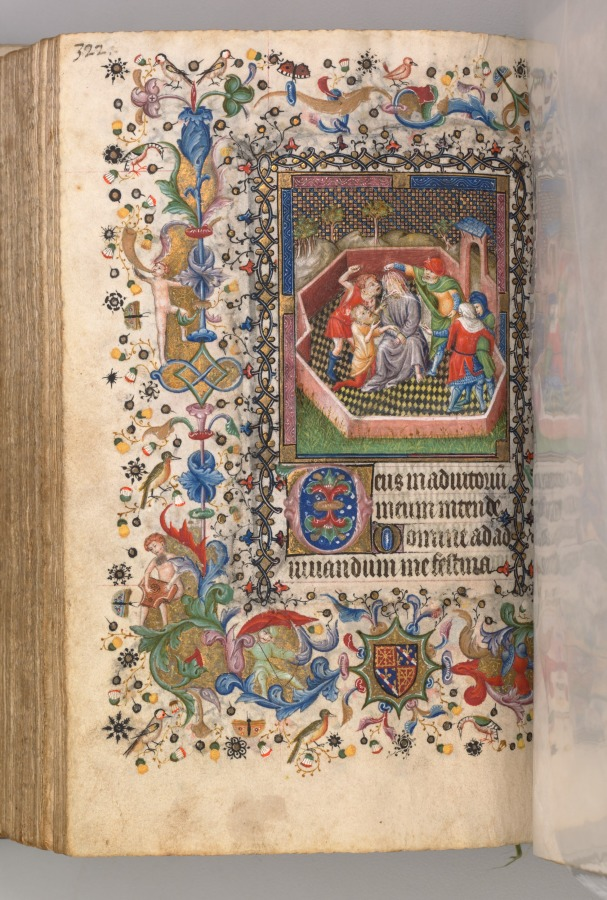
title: Hours of Charles the Noble, King of Navarre (1361-1425): fol. 161v, Mocking of Christ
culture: France, Paris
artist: Master of the Brussels Initials and Associates (French)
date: c. 1405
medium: ink, tempera, and gold on vellum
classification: Bound Volume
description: This precious volume was obviously highly prized by its owner, the French-born King of Navarre, who had his coat of arms painted on no less than twenty folios. Rather than directly commissioning this manuscript from a specific workshop, it seems that Charles the Noble acquired his book of hours -- perhaps ready-made for the luxury market -- while on a trip to Paris in 1404-05. A collaborative effort, six painting styles are evidenced within the pages of this codex, those of two Italians, two Frenchmen, and two Netherlanders. The painter who was responsible for the planning and decoration of the book, and who produced seventeen of the large miniatures, was a Bolognese artist known as the Master of the Brussels Initials. His principal assistant, responsible for most of the borders, was a Florentine who signed his name "Zecho" da Firenze on folio 208 verso.